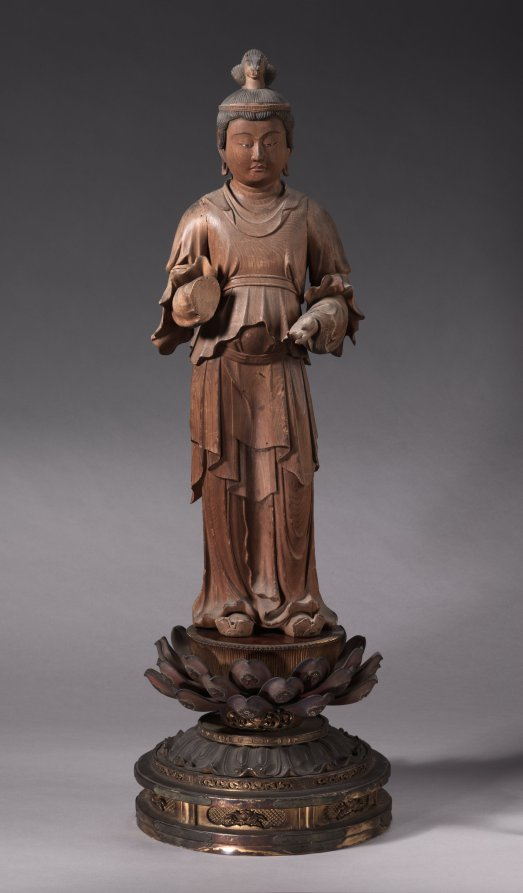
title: Batō (Horse-Headed) Kannon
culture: Japan, Kamakura period (1185–1333)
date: early 1300s, pedestal 1600s–1700s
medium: Wood with traces of color and gold; pedestal: wood with lacquer, color, and gold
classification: Sculpture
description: Batō Kannon, or Hayagriva Avalokiteshvara in Sanskrit, is the “horse-headed” form of the bodhisattva of compassion, who presides over the realm of animals in the Buddhist Six Realms of Transmigration (rebirth). A horse’s head appears in the hair of this sculpture to identify it. Bodhisattvas are beings who, though enlightened, choose to remain within the worlds of existence to help others. The six realms are heaven, hell, human, animal, hungry ghost, and ashura, or fierce supernatural entities.